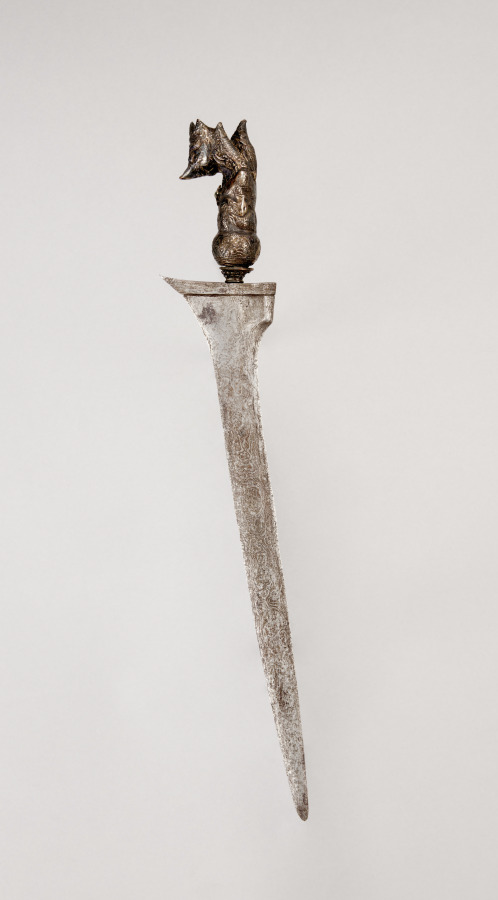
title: Sword (Kris)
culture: Java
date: 1800s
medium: iron and silver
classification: Arms and Armor